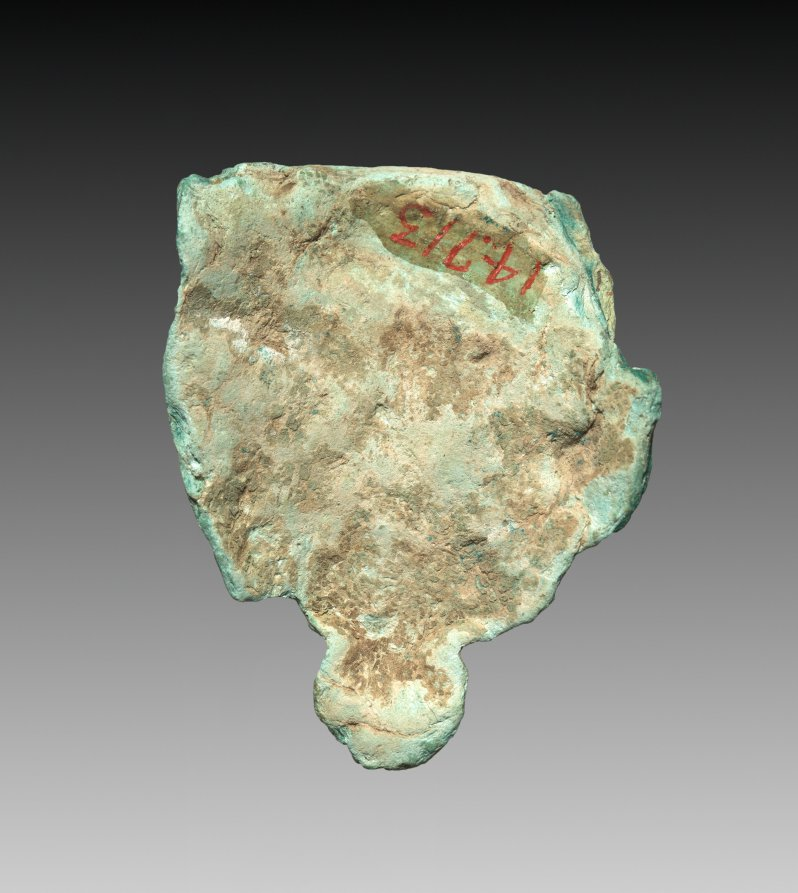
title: Mask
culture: Egypt, probably Greco-Roman period (332 BCE–395 CE)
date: 332 BCE–395 CE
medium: wax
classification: Funerary Equipment